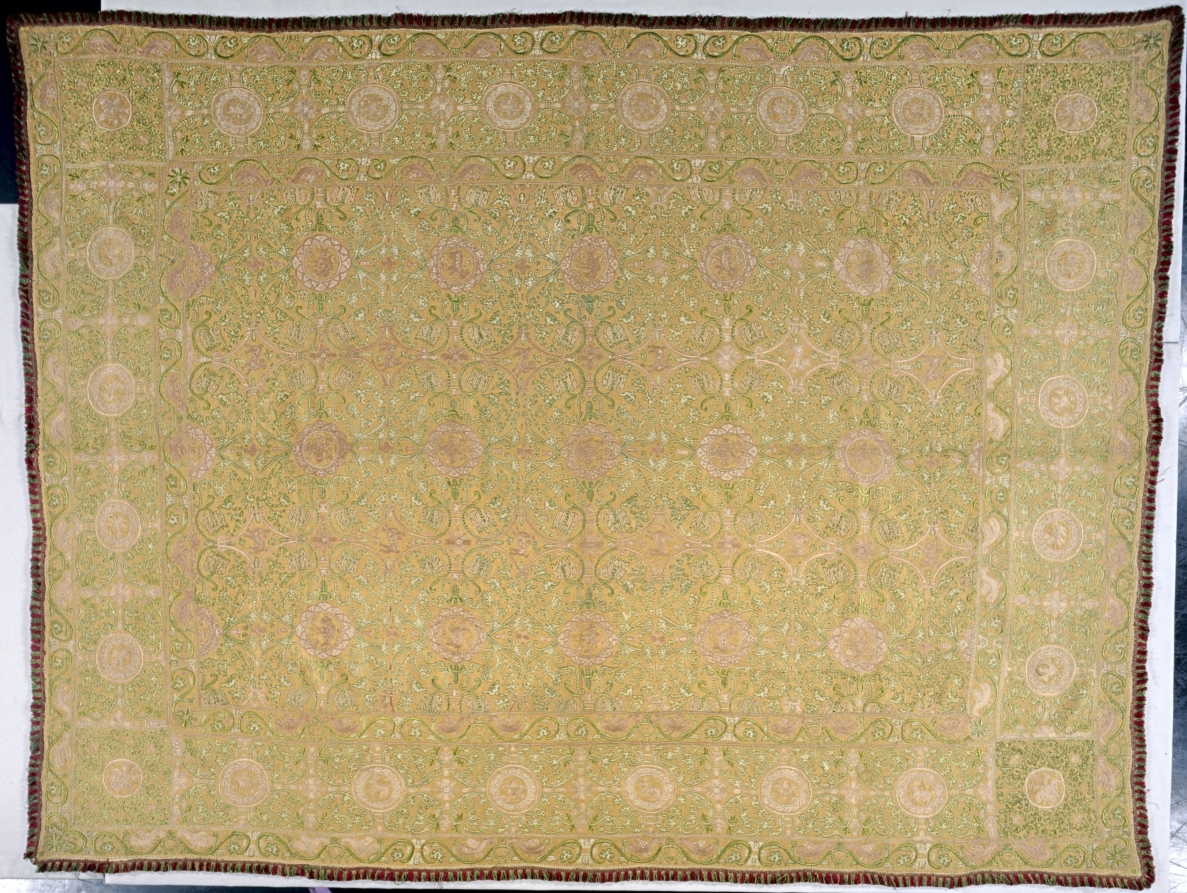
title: Embroidered Bedspread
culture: Portugal, 17th-18th century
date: 17th-18th century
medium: embroidery; silk on linen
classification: Embroidery